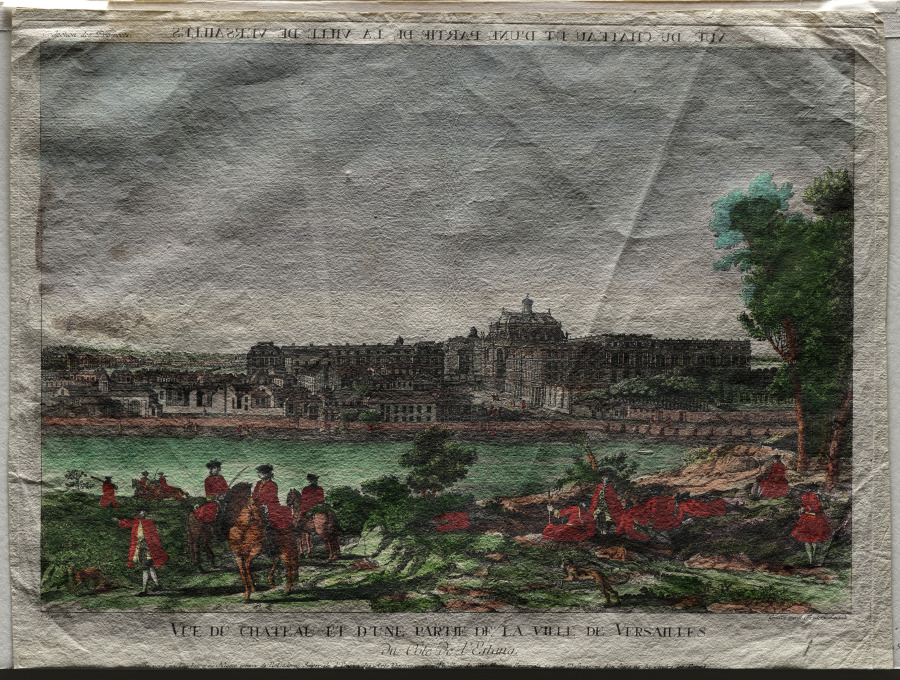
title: Vue du Chateau et d'une Partie de la Ville de Versailles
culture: France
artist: Balthasar Friedrich Leizelt (German, 1710–1820)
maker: after Jacques Rigaud (French, 1681–1754)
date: c. 1770–1800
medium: etching and engraving, hand colored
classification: Print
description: This perspective view (often called a vue d’optique,or optical view) is an example of a popular art and entertainment format during the second half of the 1700s in Europe. The hand-colored etching and engraving was made to be viewed with a special viewing device consisting of a convex lens and a mirror, so that scene appeared to be a three-dimensional image. Here, the viewer can enjoy a perspective view of the French Palace of Versailles. Such views—which were only made for a short time and largely disappeared with the advent of photography—appealed to both elite audiences, who viewed collections of images with their own viewing devices in private drawing rooms, and popular audiences, for whom they were street entertainment for a minimal fee.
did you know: The text at the top of this print is printed in reverse so that it would be legible when looking through a special viewing device consisting of a convex lens and a mirror.